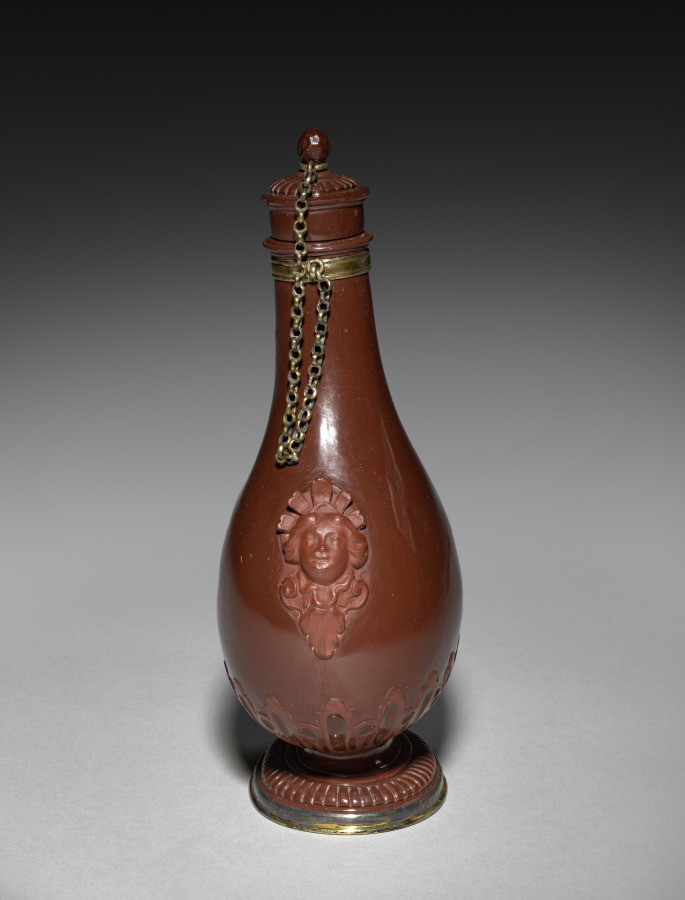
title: Pilgrim Bottle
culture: Germany, Meissen, 18th century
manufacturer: Meissen Porcelain Factory (German, est. c. 1710)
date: c. 1715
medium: polished red stoneware, silver-gilt mounts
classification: Ceramic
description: Throughout the early 1700s porcelain was imported to Europe from China and Japan, until the correct formula to produce it was developed by Johann Friedrich Böttger and a collaborator, which led to the establishment of the Meissen factory in 1710. Red stoneware inspired by Chinese Yixing ware and white porcelain were produced in Meissen under Böttger. Its fine red stoneware was so hard that it could be polished on a lapidary’s wheel—as was the body of this bottle.